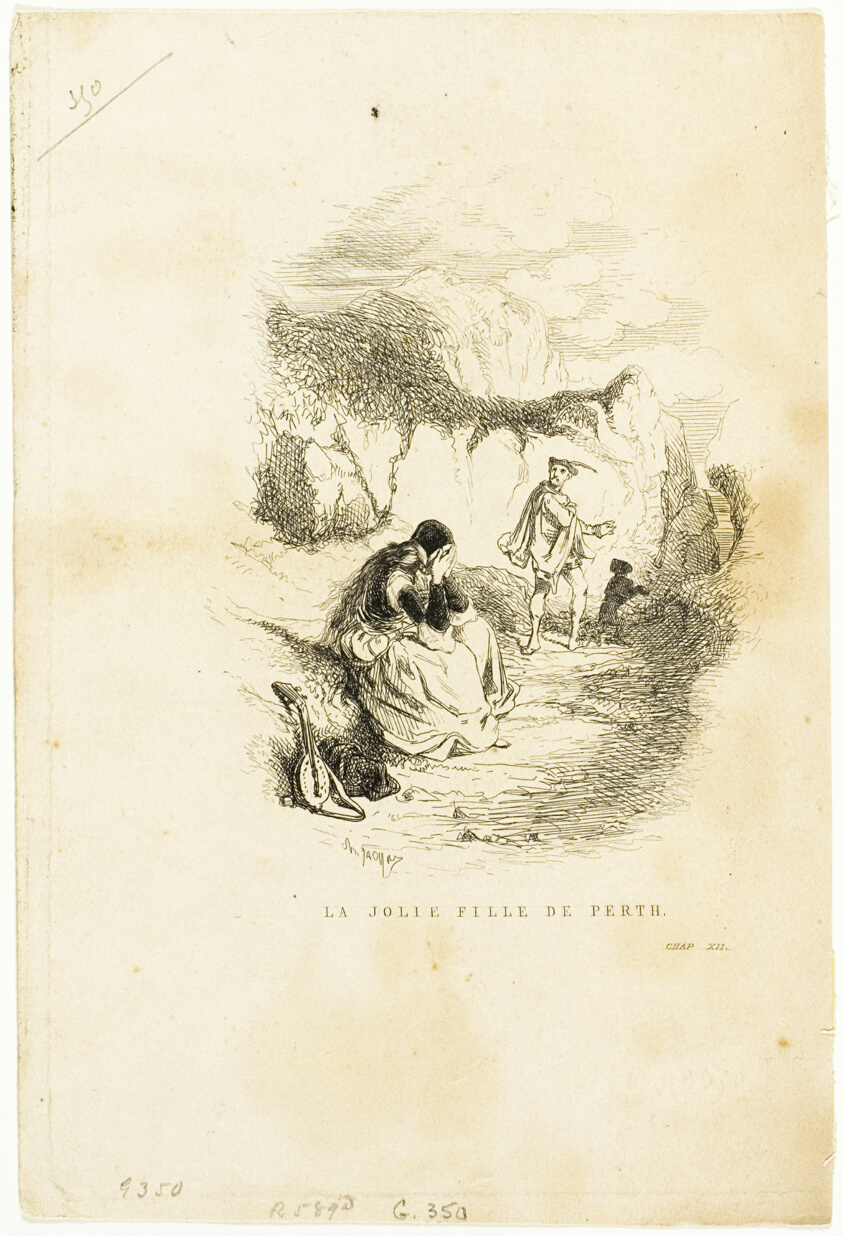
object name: Print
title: The Pretty Girl of Perth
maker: Charles Émile Jacque (French, 1813-1894)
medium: Etching and drypoint on ivory wove paper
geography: France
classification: etching; print; prints and drawing